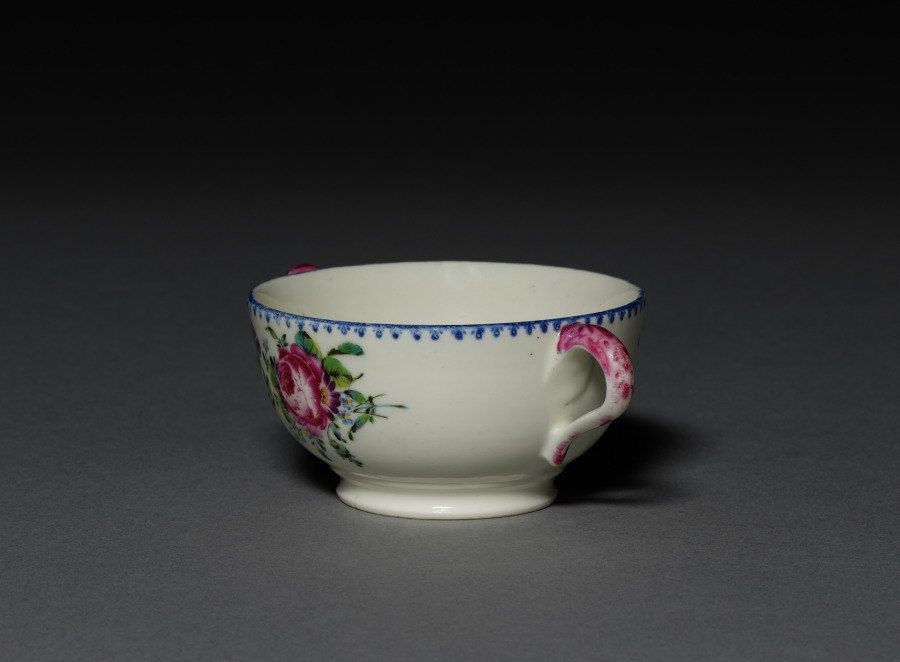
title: Broth Bowl (Écuelle ronde)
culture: France, Mennecy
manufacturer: Mennecy- Villeroy Factory (French)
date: c. 1755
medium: soft-paste porcelain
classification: Ceramic